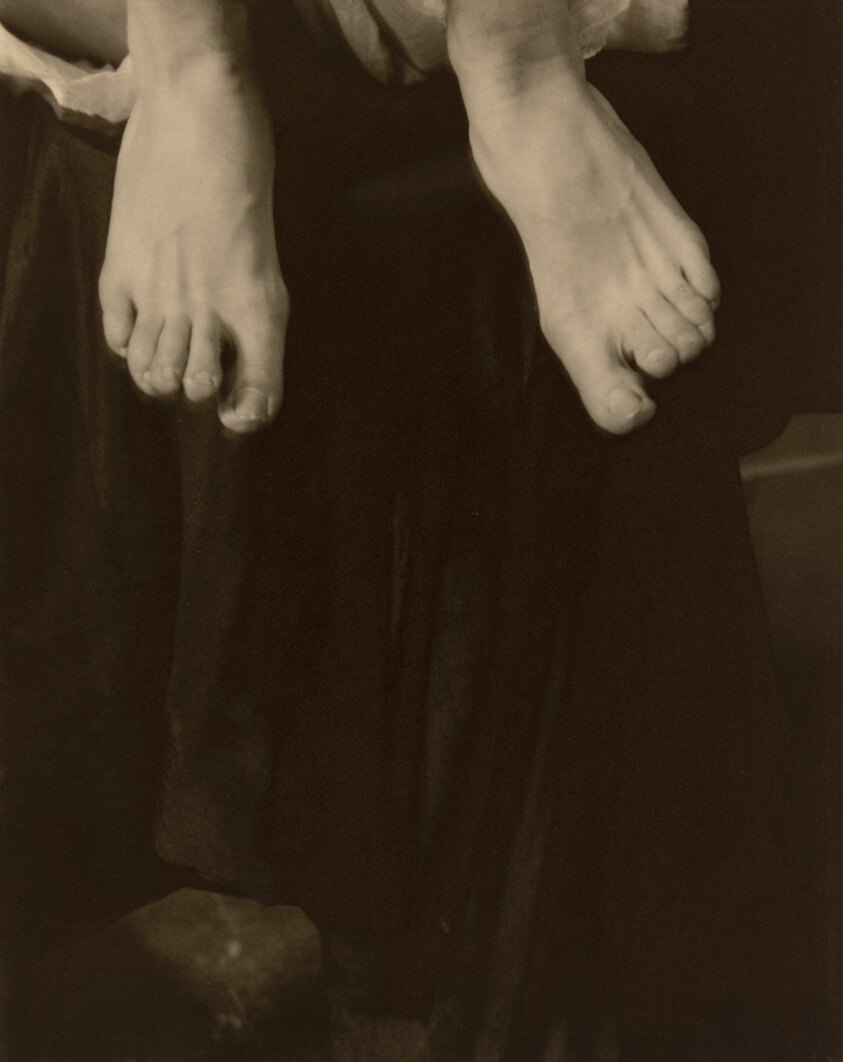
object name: Photograph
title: Georgia O'Keeffe - Feet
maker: Alfred Stieglitz (American, 1864–1946)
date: 1918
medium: Palladium print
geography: United States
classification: platinum print; photographic process; photography; photograph